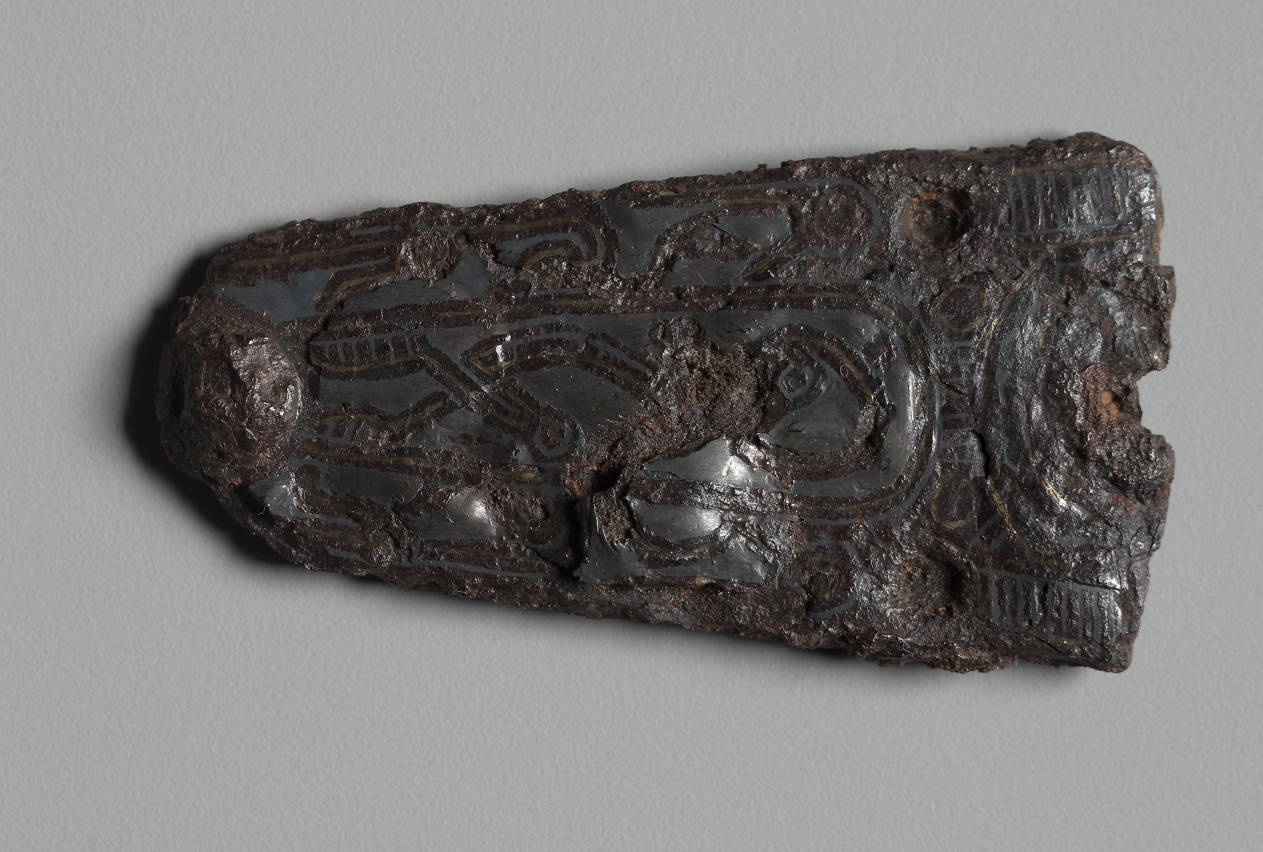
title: Clasp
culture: Merovingian, Burgundian, Migration period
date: 600s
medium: iron with silver overlay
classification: Jewelry